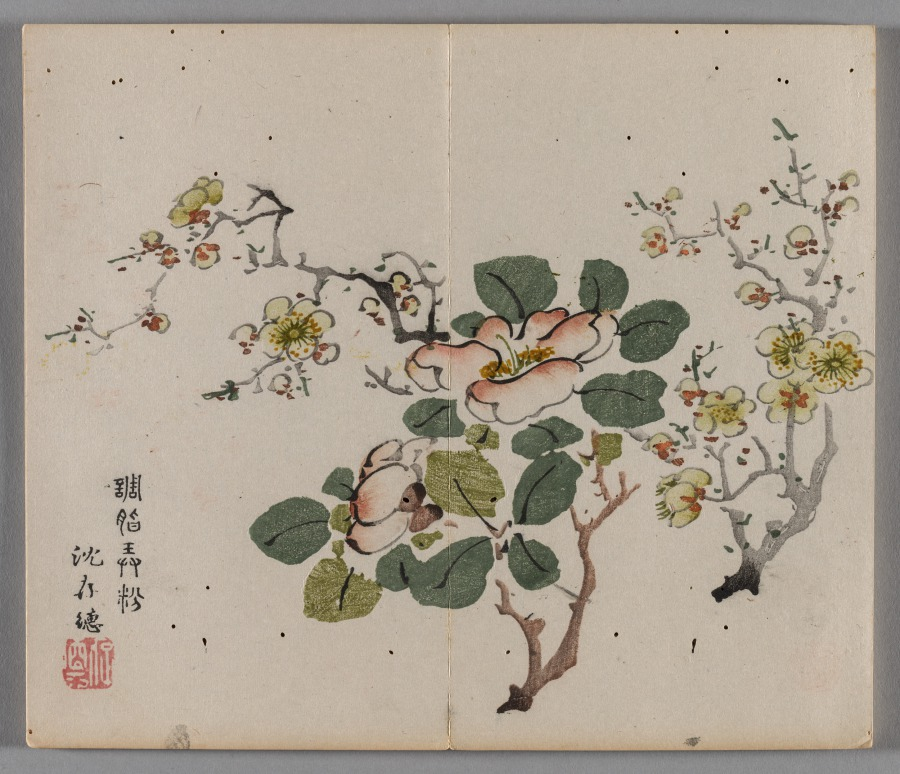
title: Ten Bamboo Studio Painting and Calligraphy Handbook (Shizhuzhai shuhua pu): Plum Blossoms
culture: China, Qing dynasty (1644-1911)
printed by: Hu Zhengyan (Chinese, c. 1584–1674)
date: 1633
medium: Woodblock-printed book; ink and colors on paper; first edition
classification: Print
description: Color printing reached a level of perfection in the early 1600s, as seen in this Ten Bamboo Studio Collection of Calligraphy and Painting and the Mustard Seed Garden Manual of Painting (printed 1679 and 1701). The painterly quality, precision in registering (aligning) the woodblocks, and harmonious colors made them the most successful color print editions in Chinese history. Both editions were printed and compiled in Nanjing, spread nationwide, and had a great impact on the arts in Japan and Korea.